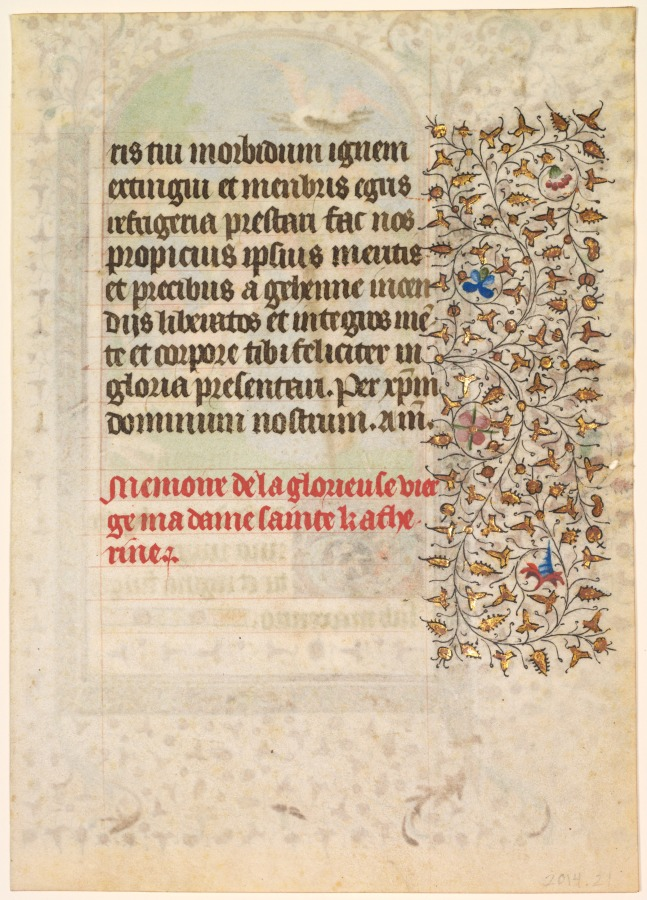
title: Leaf from a Book of Hours: Sts. Geneviève, Catherine of Alexandria, and Margaret (recto) and Text (verso)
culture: France, Paris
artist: workshop of Boucicaut Master (French, Paris, active about 1410–25)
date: c. 1415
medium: ink, tempera, silver, and gold on vellum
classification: Manuscript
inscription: Gaude dulcis katherina virgo martr et regina ful ges sub marinuo...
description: This leaf’s illumination includes Saints Geneviève, Catherine of Alexandria, and Margaret, all early church saints, virgins, and martyrs. During the 1400s and 1500s, the popularity of female saints increased, as did the literacy rate among women, thanks to books of hours. Saint Genevieve is shown with a candle the devil is trying to extinguish while an angel relights it. Saint Catherine, in the center, holds a palm branch and a sword, with which she was executed. Saint Margaret stands on the dragon from whom she emerged clean and unharmed when the cross she carried irritated the dragon’s innards.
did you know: A typical book of hours contains around a dozen suffrages or individualized prayers to specific saints.